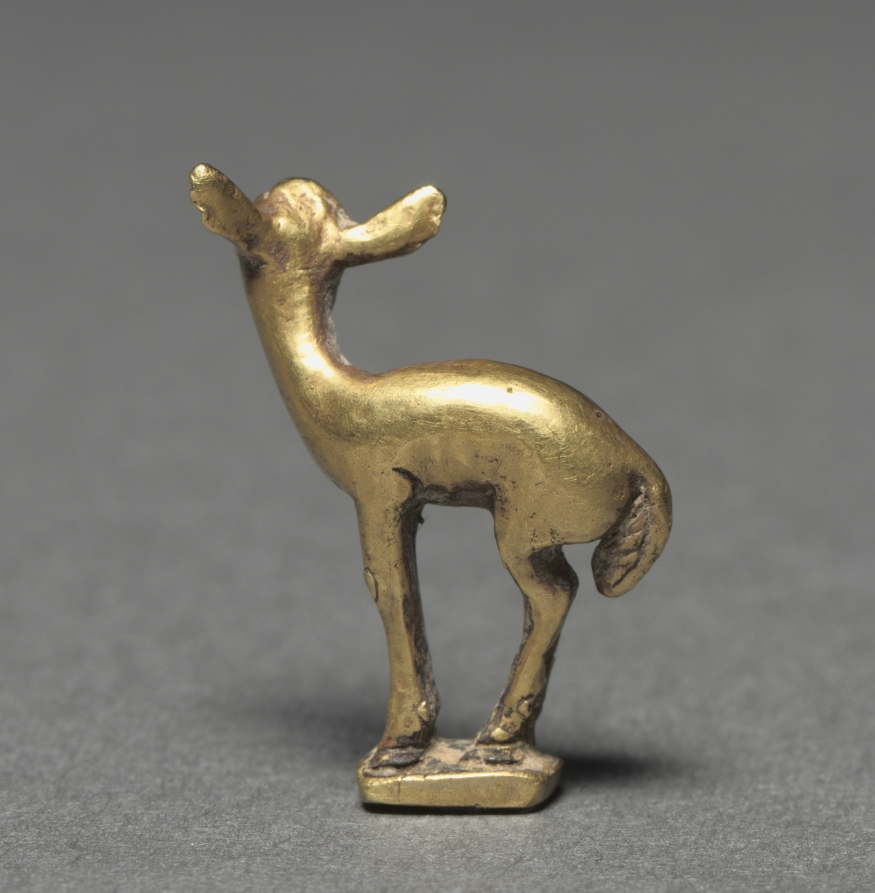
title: Elk Fawn Finial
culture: Western Asia, Scythian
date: 400–200 BCE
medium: gold, solid cast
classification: Sculpture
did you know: This artistically sensitive depiction of an elk fawn describes its features with great artistry, form harmonizing with function. Although a nomadic culture, the Scythians were noted as much for their virtuosity in metalwork as for their equestrian skills. Made of solid gold, this finial is an exquisite example of portable wealth.